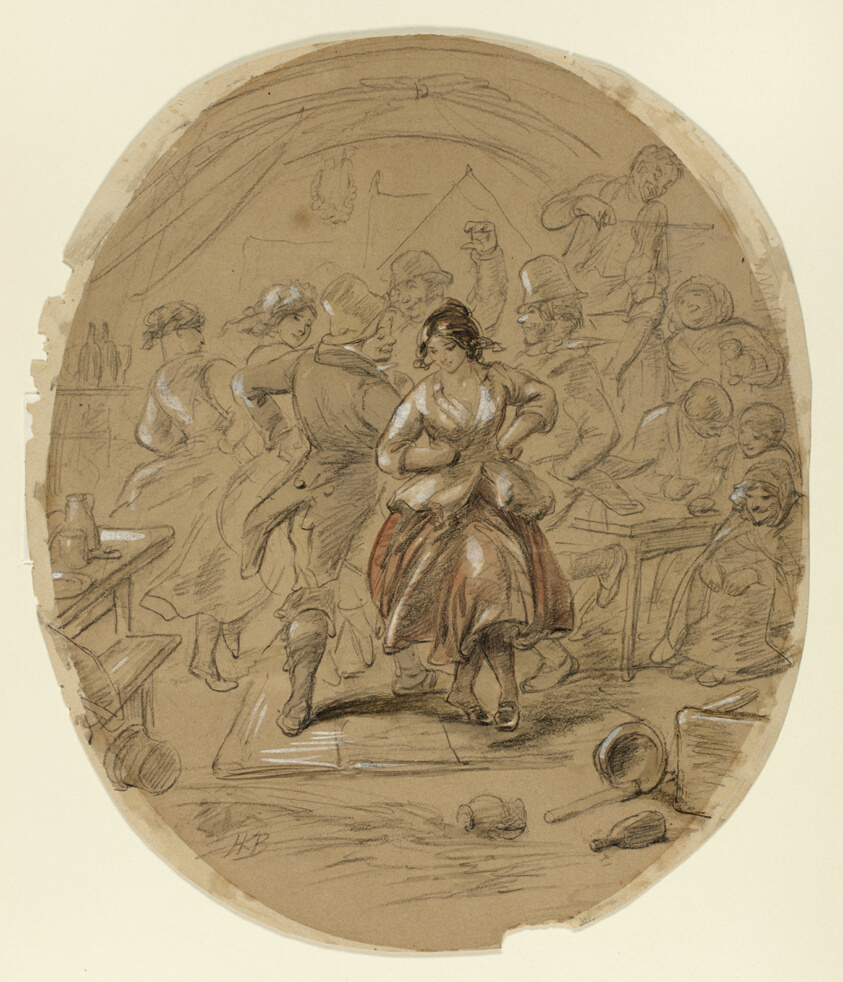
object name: Drawing and Watercolor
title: Irish Dance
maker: Hablot Knight Browne (English, 1815-1882)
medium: Black crayon, with brush and gray and red wash and touches of red pencil, heightened with white gouache, on tan wove paper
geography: England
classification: charcoal; drawings (visual works); prints and drawing